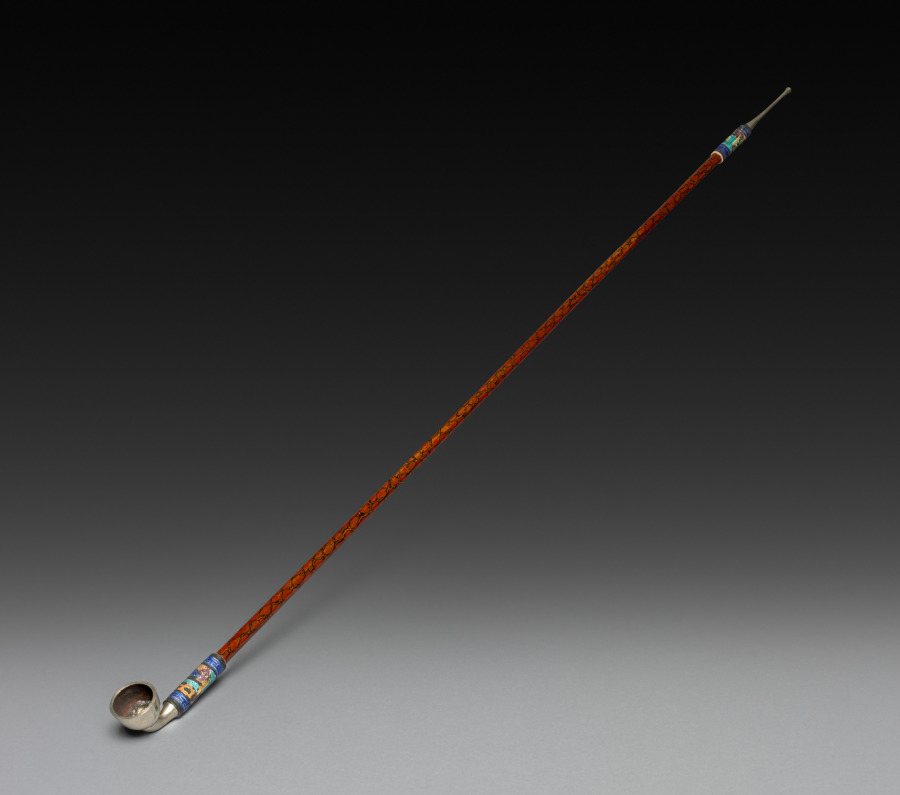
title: Tobacco Pipe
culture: Japan, Edo period (1615–1868)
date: 1700s to mid-1800s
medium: wood and metal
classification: Miscellaneous